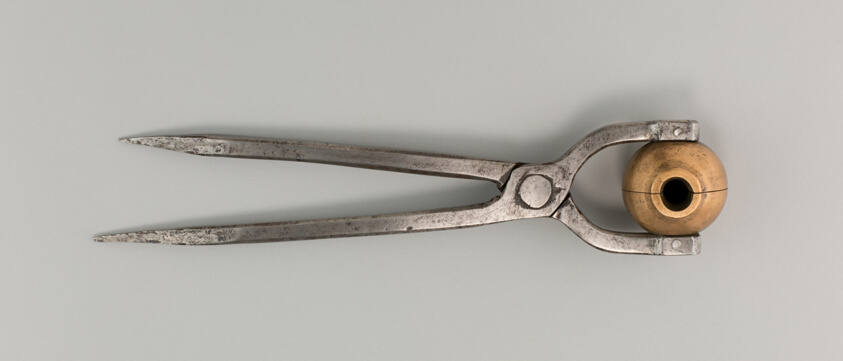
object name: Arms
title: Bullet Mold for a Light Artillery Piece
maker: Austrian, Tyrol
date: 18th century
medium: Brass, iron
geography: Tyrol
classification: firearm-accessory; arms; arms and armor